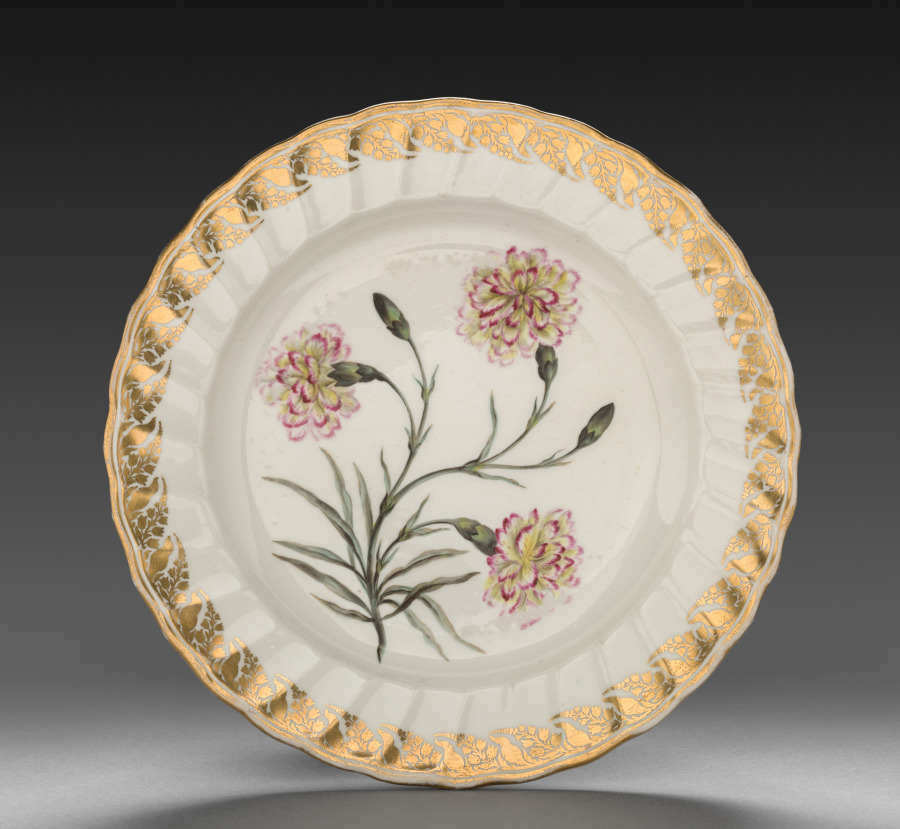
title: Plate from Dessert Service: Picatee Carnation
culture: England, Derby, 18th century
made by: Derby (Crown Derby Period) (British)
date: c. 1800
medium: porcelain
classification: Ceramic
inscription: inscribed in blue on back: Dianthus./Picatee carnation./crown/crossed batons and dots/D/115. Near edge: 9.